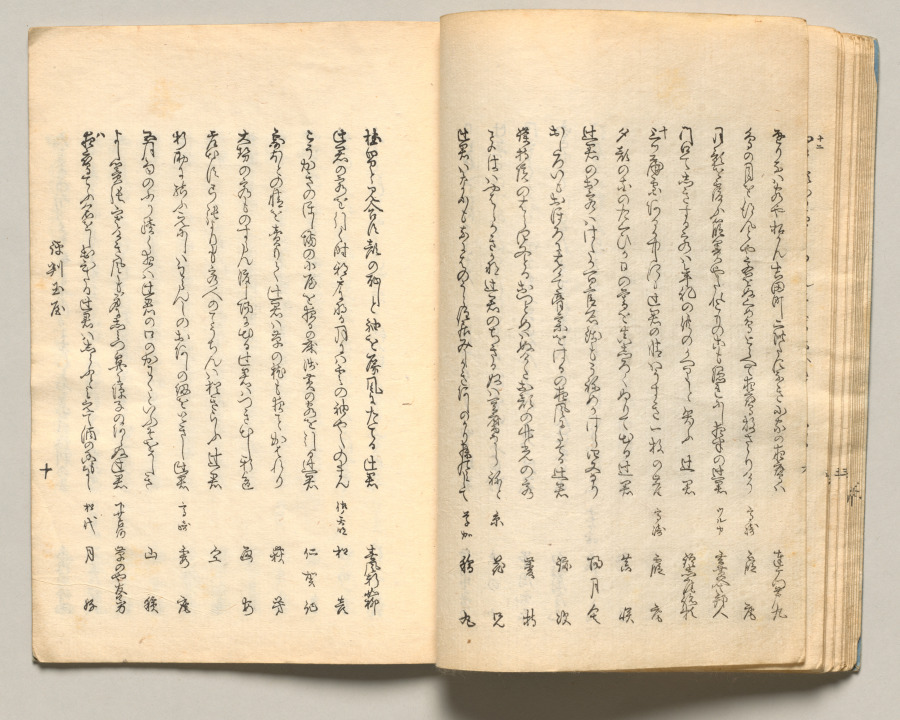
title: Spread Seventeen from Volume Three of People of Japan in Light Verse (Kyōka)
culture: Japan, Edo period (1615–1868)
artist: Utagawa Hiroshige (Japanese, 1797–1858)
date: 1857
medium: Woodblock-printed book; ink and color on paper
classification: Bound Volume